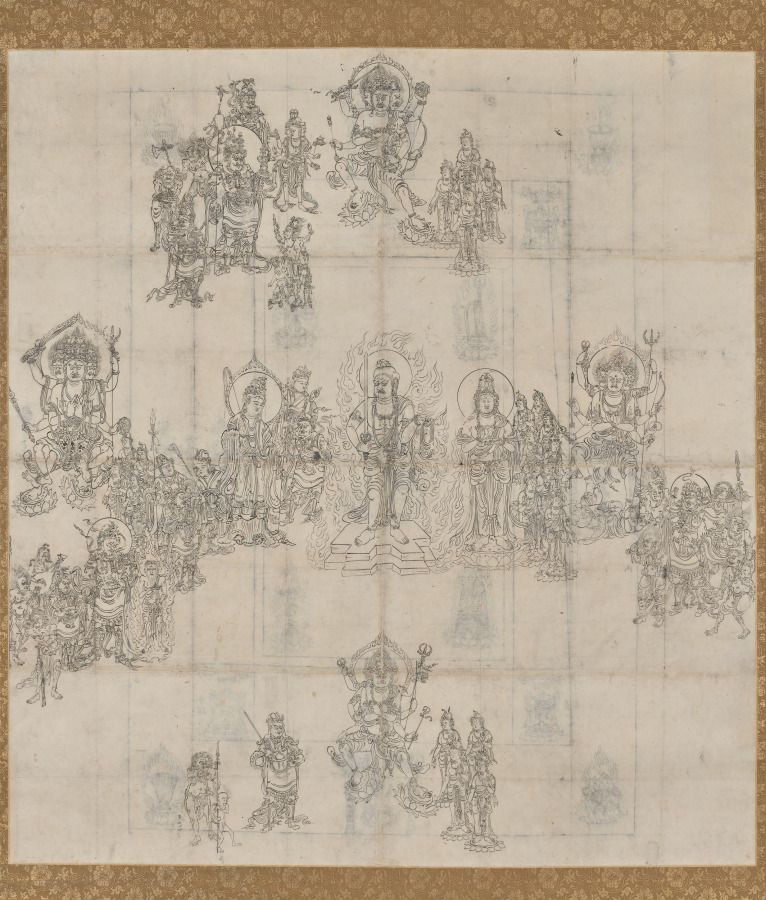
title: Iconographical Sketch (Zuzō) for the "Benevolent Kings Sutra Mandala"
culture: Japan, Heian period (794–1185)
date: 1100s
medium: Hanging scroll; ink on paper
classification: Painting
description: The Benevolent Kings Sutra has been a highly valued Buddhist scripture in Japan since the Nara period (710–794), when it started to be recited in a ceremony to pray for the peace and protection of the country. In the 800s, the monk Kūkai brought back from China a new translation of the text as well as Buddhist iconographic sketches to perform the rituals based on the sutra. Five scroll sets of copies of the original sketches brought by Kūkai are preserved in Daigoji and Tōji temples in Kyoto. This sketch, which has figural depictions of deities on the front and deities symbolized by objects on the back, differs in some ways from each of those sets, and represents an alternate approach to creating a mandala based on the Benevolent Kings Sutra.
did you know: The deity at the center is Fudō Myōō, the Immovable One.